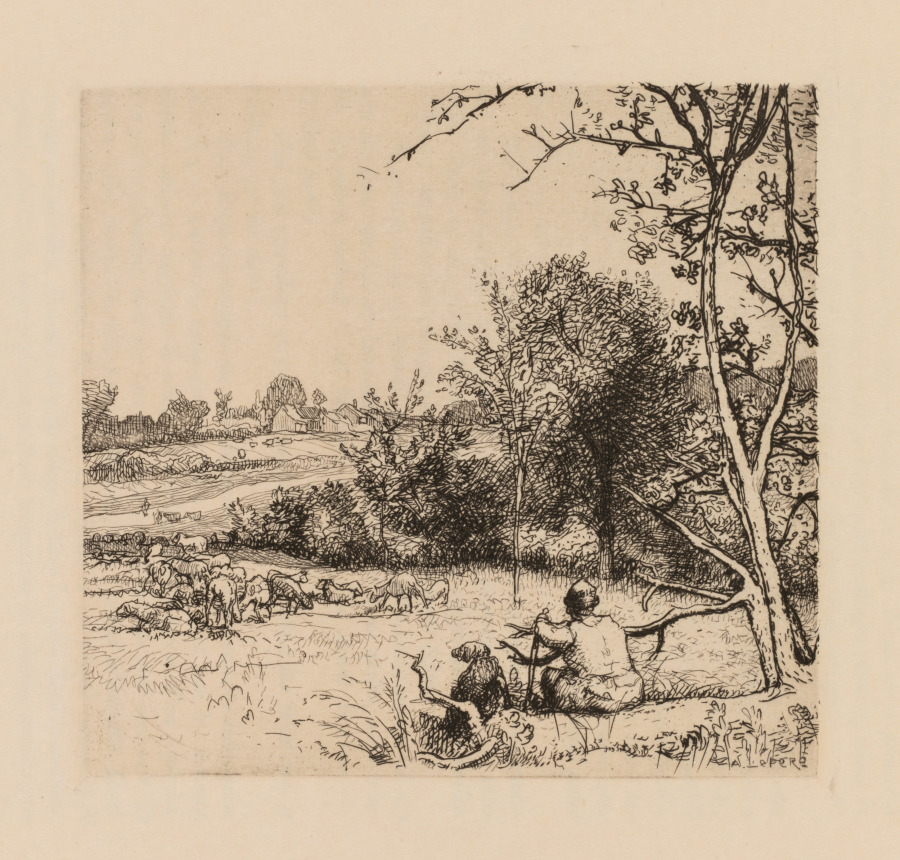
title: Auguste Lepère: Le pommier renversé (Picardie)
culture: France, 20th century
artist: Auguste Louis Lepère (French, 1849–1918)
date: 1931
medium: Etching, from bound volume with seven etchings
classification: Bound Volume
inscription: On tissue guard, lower right: 405. LE POMMIER RENVERSÉ (PICARDIE); On plate, within image, lower left margin: A. Lepère